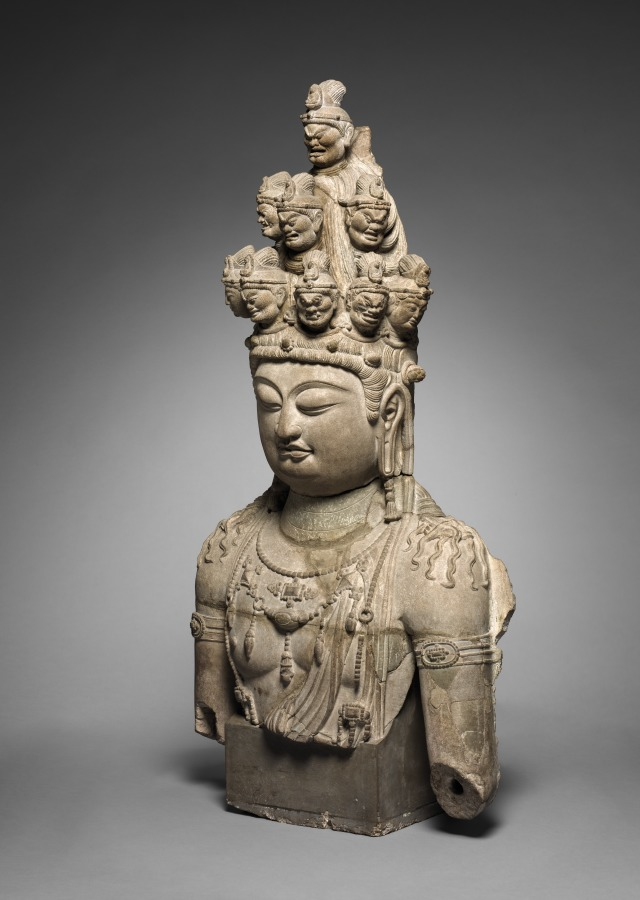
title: Eleven-Headed Guanyin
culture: China, Tang dynasty (618-907)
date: early 700s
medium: gray sandstone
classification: Sculpture